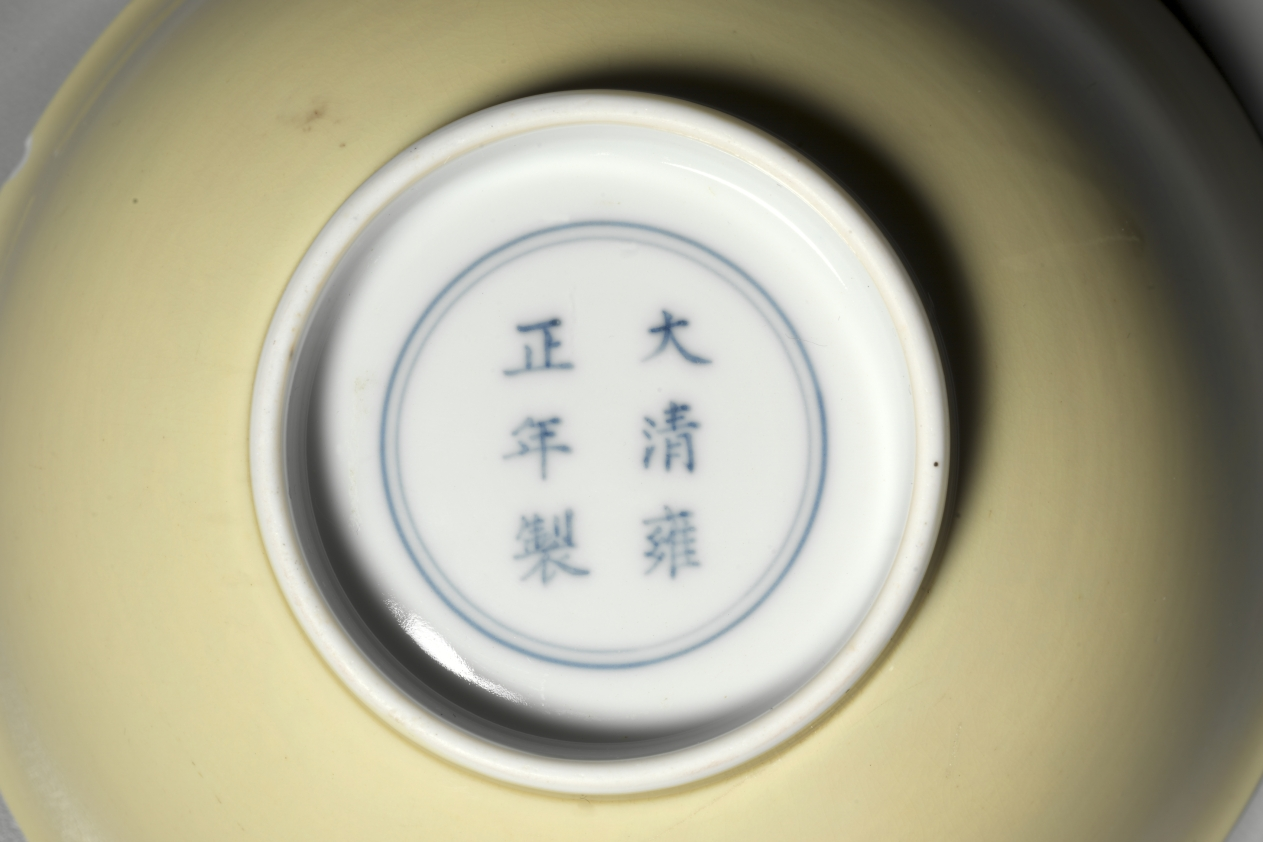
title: Bowl with Yellow Glaze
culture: China, Qing dynasty (1644-1911), Yongzheng mark and reign (1723-35)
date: 1723–35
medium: glazed porcelain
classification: Ceramic